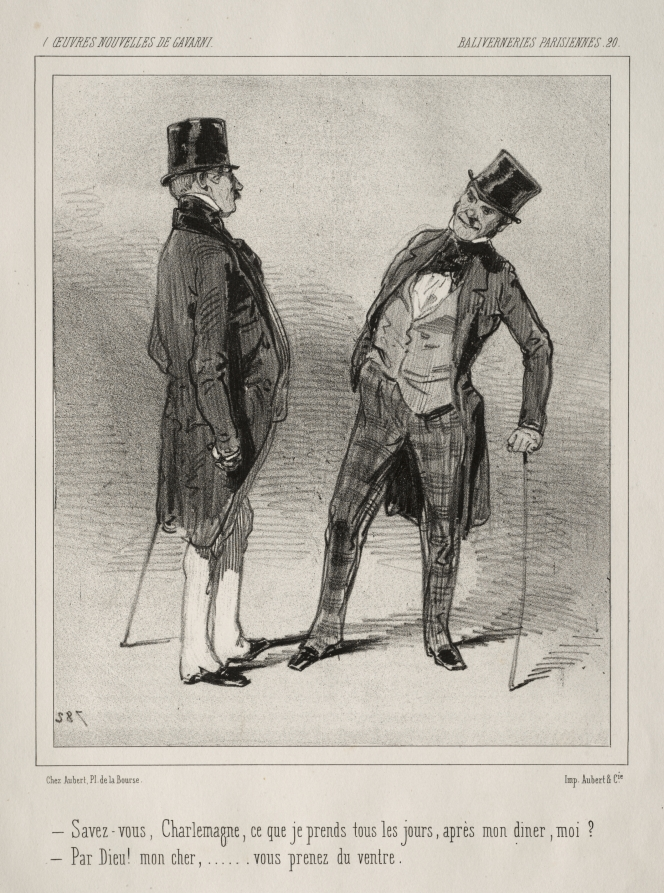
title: Baliverneries Parisiennes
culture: France, 19th century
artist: Paul Gavarni (French, 1804–1866)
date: c. 1847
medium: lithograph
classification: Print